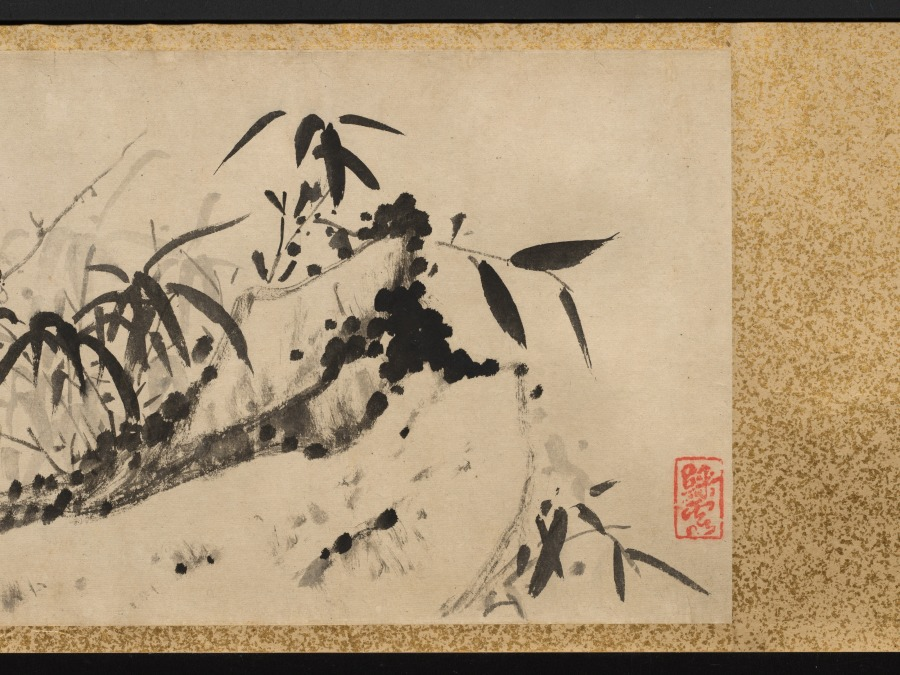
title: Plum Blossoms and Peonies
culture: China, Qing dynasty (1644-1911)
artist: Gao Fenghan (Chinese, 1683–1749)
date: 1741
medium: handscroll, ink on paper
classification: Painting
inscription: Artist's 2 inscriptions and 9 seals (the painting of Peonies with the artist's colophon and the colophon by Hou Chia-fan are on a single sheet of paper). Artist's inscription and 2 seals (Plum Blossoms): [seal] Ts'ai-yün. After finishing writing my colophon, I unrolled the painting to take another look, and it now seems that the composition here should have moved to the later part of the scroll. If that is the case, then the "Cool Beauty" [prunus] of the Solitary Hill is after all unable to take precedence over the "King of Flowers" [peony]. A laugh. Lao-fou inscribed. [seal] Feng-han. Artist's colophon (Plum Blossoms): [3 seals] Tun; Yen-yün-kung-yang, Hou-shang-tso-sheng. A few days after I painted this scroll for Shui- hsien [Yüeh Meng-yüan], the plum blossoms were in full bloom at his residence. He invited me over to enjoy them together for a long while, and I composed two additional poems and wrote them down here for his criticism. [Poems on the colophon are not translated.] First month, twenty-first day, your junior, Kao Feng-han of Nan-fou drafted this with the left hand. [seal] Feng-han. Artist's inscription and 4 seals (Peonies): Brushed with the left hand in the hsin-yu year [1741]. [seal] Yu-hsi. [3 seals at end of painting] Hou-shang-tso-sheng; Yen-yün-kung-yang; Shih-tsao-wu. Artist's colophon and seal (Peonies): The imperial concubine from the Yang family loved to dress in red, And from the emperor won the title of Hai-t'ang. But ever since she became the new dream of the moon palace, She changed into rainbow colors, while learning to dance. After I wrote the poem on Looking for Plum Blossoms in the Teng-wei Mountains, I attached to it a few branches of prunus, some bamboo tips and a piece of rock, with a scattering of green [moss] here and there to fill up the scroll. Unexpectedly, my playful fascination [with these subjects] was still not quite satisfied, so I made up these amorous ideas and romantic images [of the peony], to follow the footsteps of the fair lady of the Ku-hsieh Mountain [prunus]. Furthermore, I picked out one poem to be my vanguard. Perhaps such luminosity of wealth and power will be enough to overwhelm the poor fellows, and [they] will not mind the comparatively short length [of paper] assigned to it. Amusingly inscribed. Please correct me again. To Shui-hsien, my learned senior, your junior Han inscribed again. [seal] Tso-hua [left-handed painting]. 1 additional colophon and 5 additional seals: 1 colophon, dated 1742, and 3 seals of Hou Chia-fan (act. ca. 1742); 1 seal of P'u Ch'üan (20th c.?); 1 seal of Li family (dates unknown).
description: One of the so-called Yangzhou Eccentrics (a group of painters who lived in Yangzhou and were known for their unorthodox art and lifestyle), Gao Fenghan depicts China’s two most loved flowers in full bloom—the “cold beauty,” or plum blossom, in the first section, and the “king of flowers,” or peony, in the second section. Painted in 1741, the year when Gao decided to leave the south and return home to Shandong province in eastern China, this work was likely a token of farewell. His casual brushwork may indicate his mental and physical struggle at the time. After having crippled his right hand in 1737, Gao used his left hand to paint and achieved a crudeness and eccentric style unattainable before.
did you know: In East Asian art, peonies traditionally symbolize prosperity and wealth.